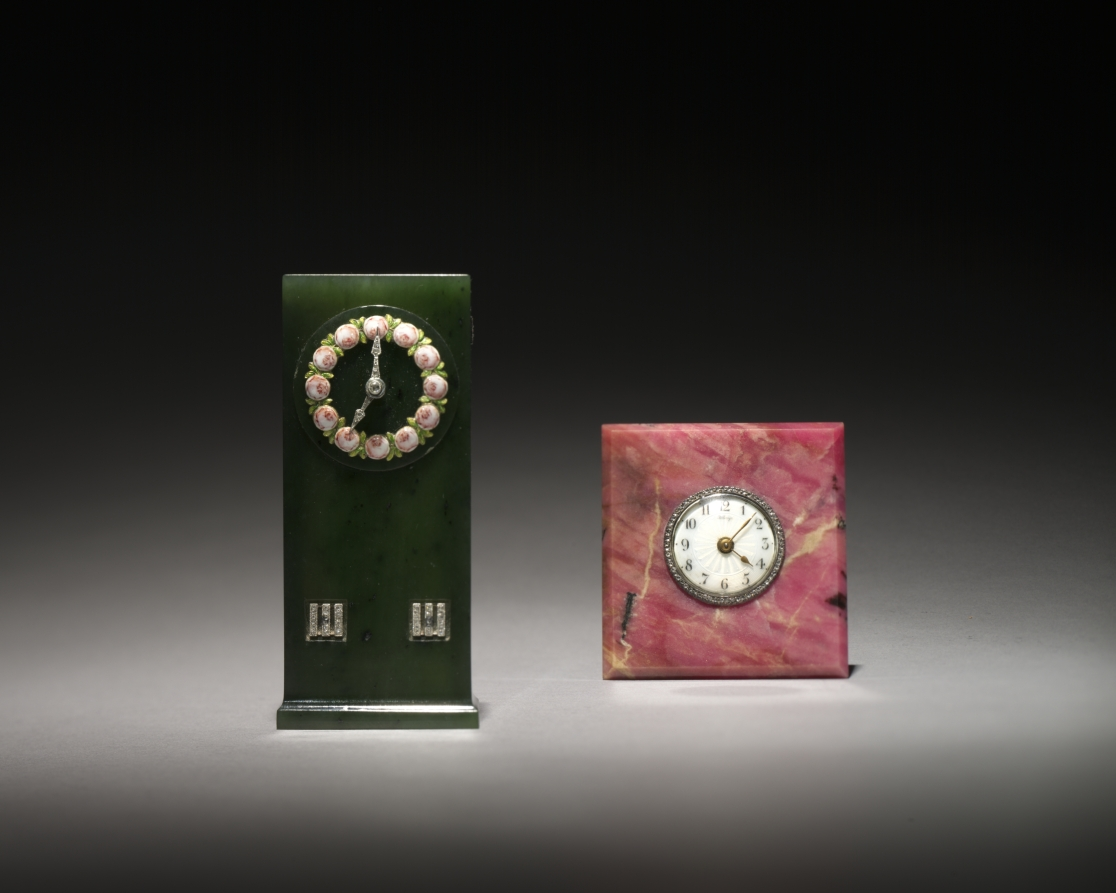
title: Clock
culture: Russia, St. Petersburg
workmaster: Henrik Wigström (Russian, 1862–1923)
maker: House of Fabergé (Russian, 1842–1918)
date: 1908–17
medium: nephrite, gold, enamel, diamonds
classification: Timepiece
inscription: 72, Kokoshnik, lower case alpha in script [assay mark for St. Petersburg, 1908-26]; 72; Fabergé; H.W. [initials of workmaster Henrik Wigström]; 22681 scratched; NS/15P scratched.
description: The use of Russian hardstones in creating precious objects became a hallmark of design from the House of Fabergé. Easily carved, these minerals were sourced largely from the western region surrounding the Ural Mountains. Fabergé's workmasters used colorful stones such as agate, lapis lazuli, rock crystal, rhodonite, and nephrite (jade), seen here in this small desk clock, to create and embellish flower studies, animal figures, and all manner of luxurious accessories.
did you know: The face of this small luxurious desk clock features tiny pink enameled roses in place of the customary numbers along with hour and minute hands paved in diamonds.